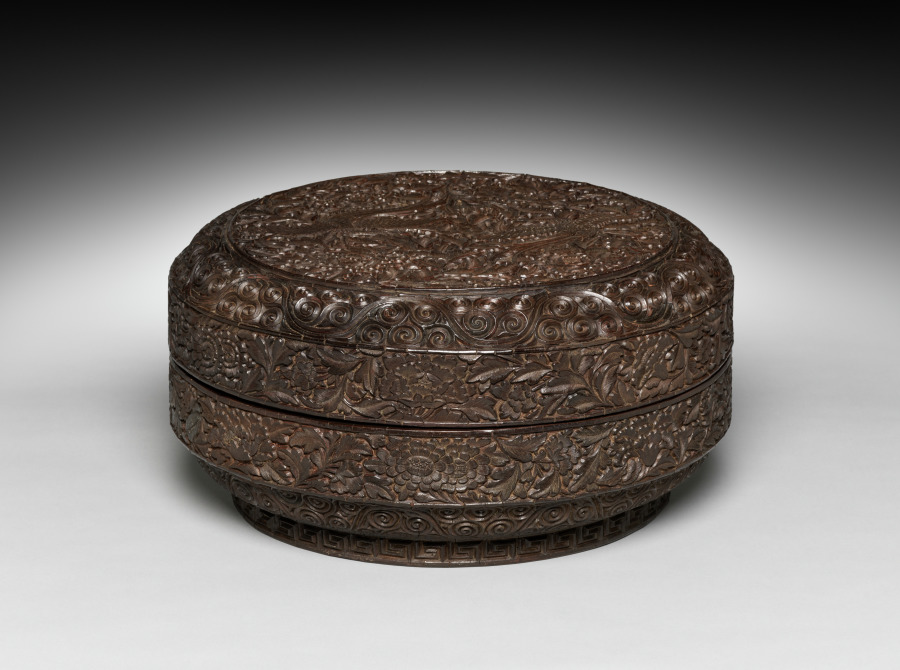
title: Round Box with Bird and Peonies Design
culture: China, late Southern Song (1127–1279) to early Yuan dynasty (1271–1368)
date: c. 1300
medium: carved lacquer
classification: Lacquer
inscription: 山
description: The carved lacquer box and lobed silver container nearby both feature pairs of birds and flowers on their covers. There is a striking similarity in decoration, shape, and aesthetic appeal. Both boxes suggest that successful designs and shapes circulated among craftsmen, workshops, and beyond regional borders.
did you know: Lacquer ware was always a valuable product in Chinese material culture and was often used as precious gifts in diplomatic, religious, and economic exchanges with other countries—Japan, for example, where this box was long preserved and acquired.